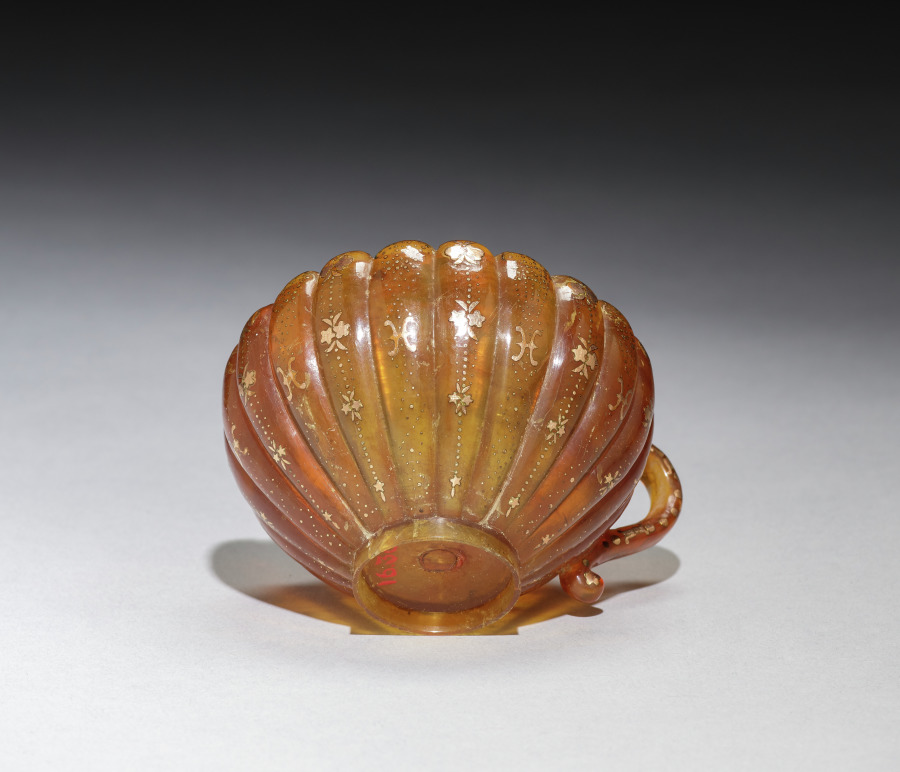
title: Cup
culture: France, 18th century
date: c. 1730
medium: amber decorated with inlaid gold and mother-of-pearl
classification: Miscellaneous